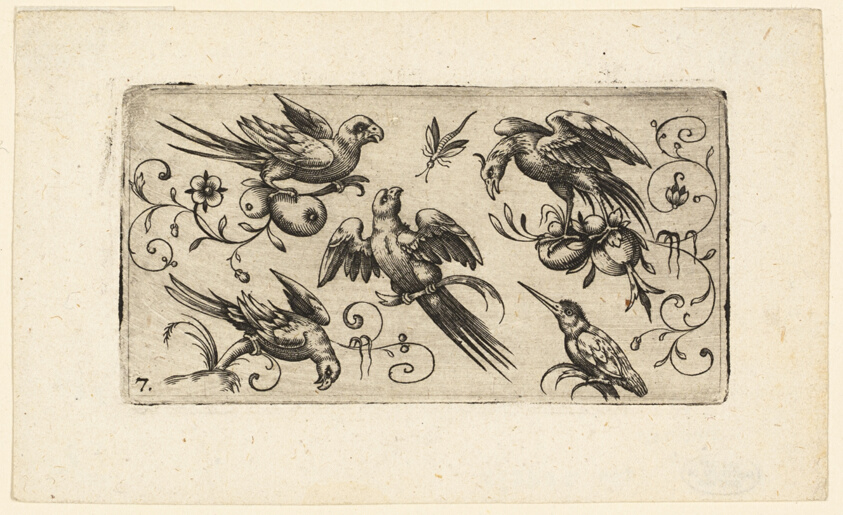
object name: Print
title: Ornament Panels with Birds: Plate 7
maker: Adrian Muntink (Dutch, active 1597-1617)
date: 1617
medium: Engraving in black on paper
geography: Netherlands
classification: engraving; print; prints and drawing